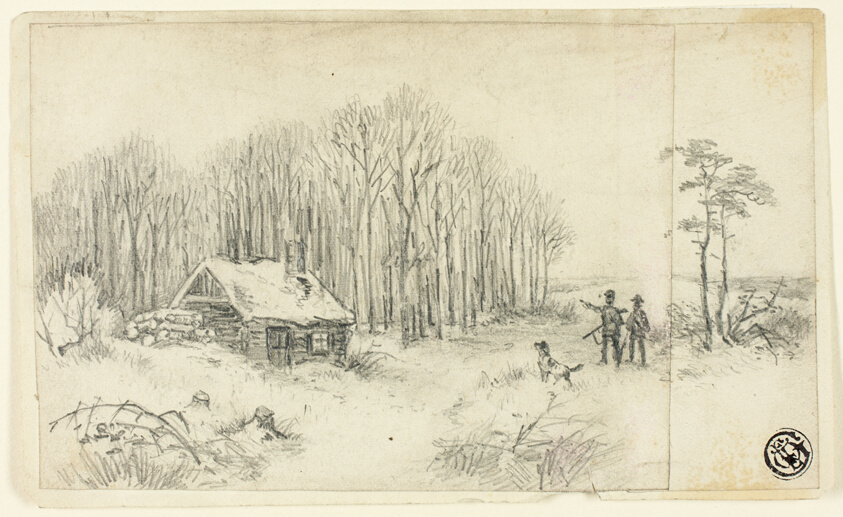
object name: Drawing and Watercolor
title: Woodland Hut, with Hunters Approaching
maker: Unknown Artist; American, 18th/19th century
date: 18th or 19th century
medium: Graphite on ivory wove paper, pieced together and laid down on ivory wove paper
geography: United States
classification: graphite; drawings (visual works); prints and drawing